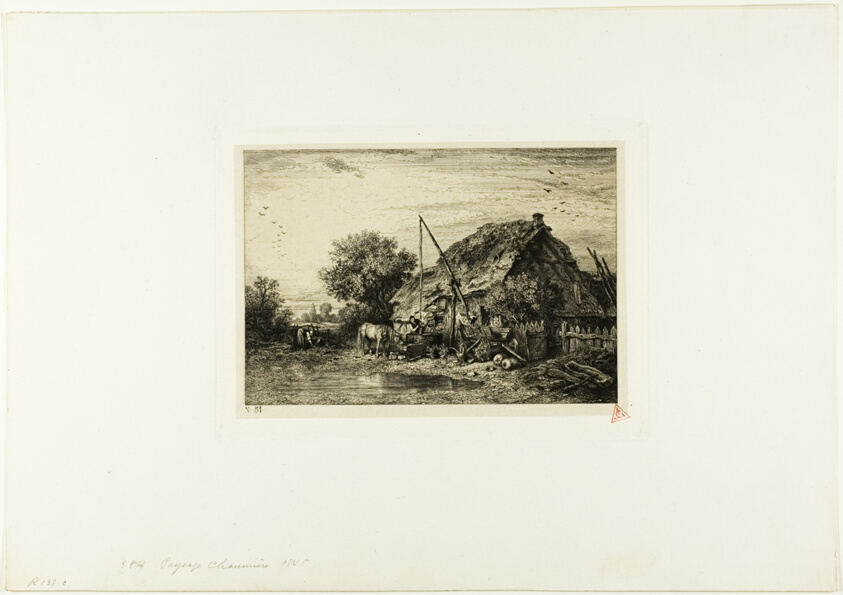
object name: Print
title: Peasant House with Pond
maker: Charles Émile Jacque (French, 1813-1894)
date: 1845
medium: Etching, engraving and drypoint on light gray China paper laid down on ivory wove paper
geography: France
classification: etching; print; prints and drawing